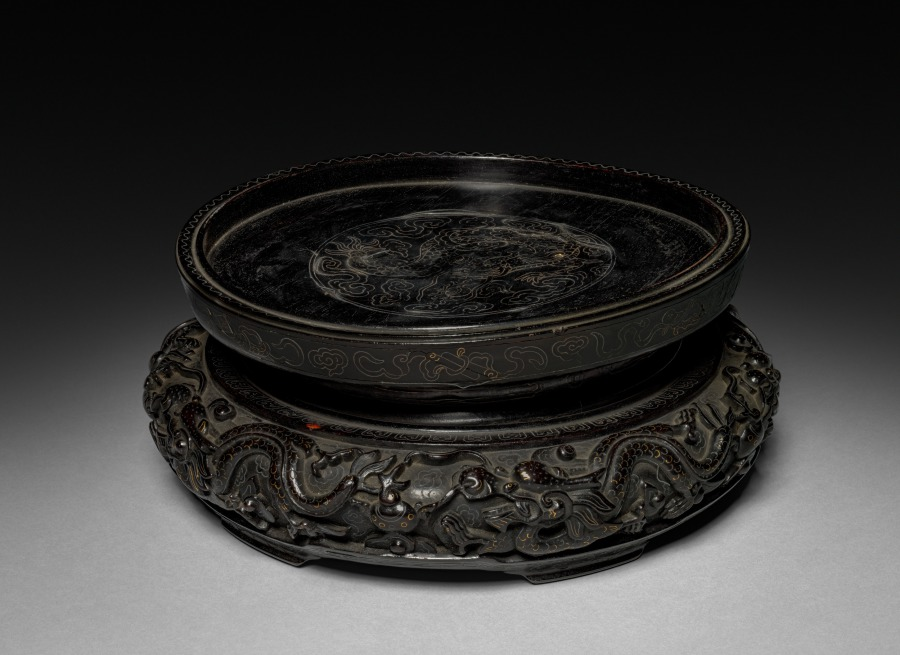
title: Jar with Chrysanthemum Decoration (base)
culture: China, Ming dynasty (1368–1644)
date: 1368–1644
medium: porcelain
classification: Ceramic